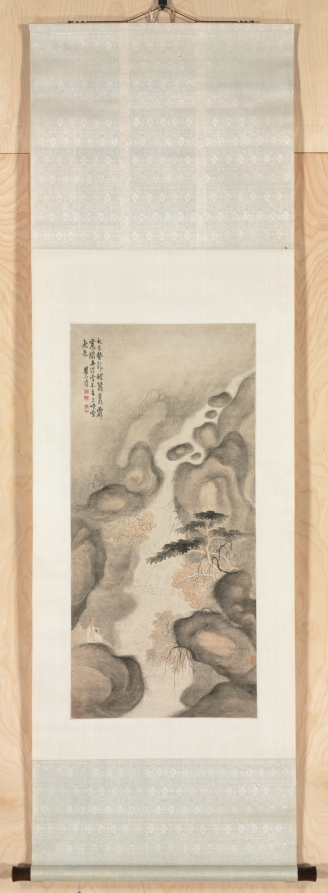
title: Nine Dragon Pool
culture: China, Qing dynasty (1644-1911)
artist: Mei Qing (Chinese, 1623–1697)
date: 1690s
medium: hanging scroll, ink and light color on paper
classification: Painting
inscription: 太古蟄龍醒，蠺叢霹靂開。 五溪雲不去，三峽雪飛來。 瞿山, 清。 [印] 梅清; 淵公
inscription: 2 additional seals: 1 of Dai Xi 戴煕 (1801–1860); 1 unidentified.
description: In the second half of the 1600s, Huangshan 黃山 (Mt. Huang or Yellow Mountain) attracted many visitors and inspired artists like Mei Qing. He probably sketched the Nine Dragon Pool on his second trip to the mountain range in 1690, at the advanced age of 68 sui. This dramatic waterfall has nine curves, each forming an emerald green pool. After heavy rain, the rushing water looks like nine white dragons.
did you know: Huangshan 黃山 is a UNESCO World Heritage site known for its spectacular rocky peaks, sea of clouds, oddly shaped pine trees, and hot springs.